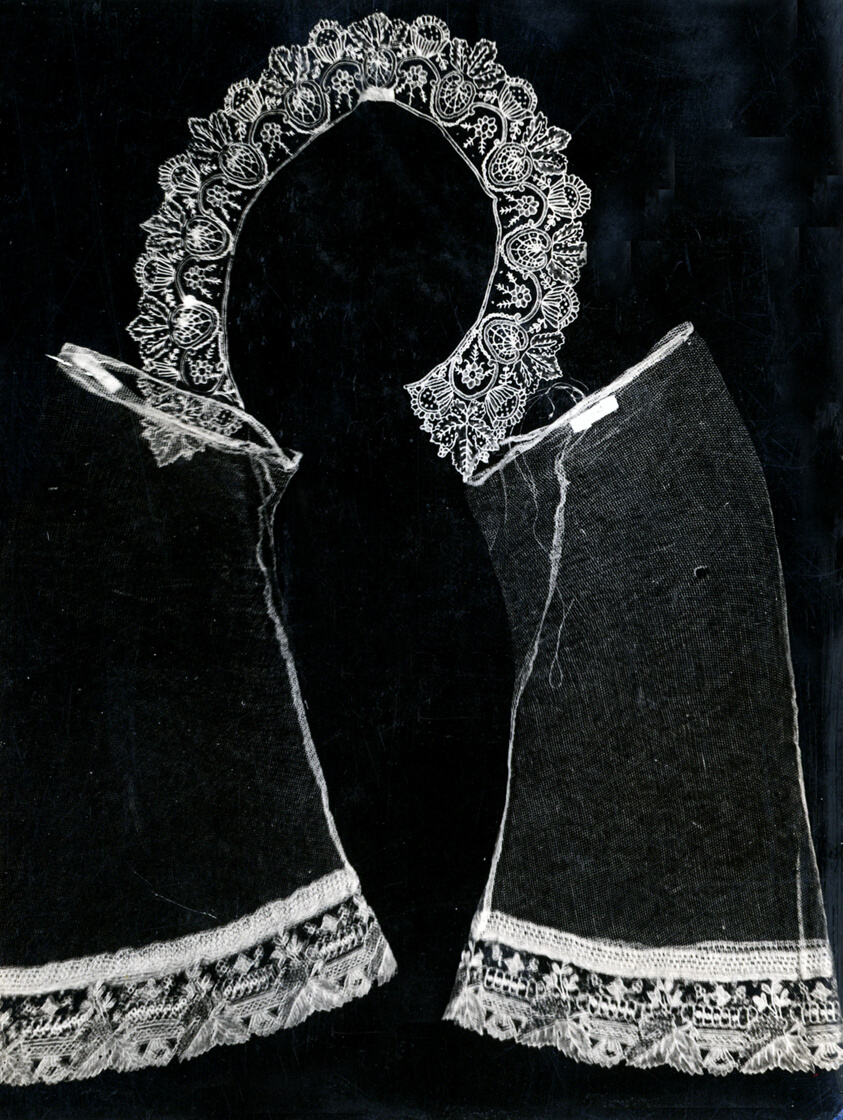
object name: Textile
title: Collar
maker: Belgium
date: 1860s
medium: Cotton, needle lace of a type known as "Point de Gaze"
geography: Belgium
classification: textile; lace - needle